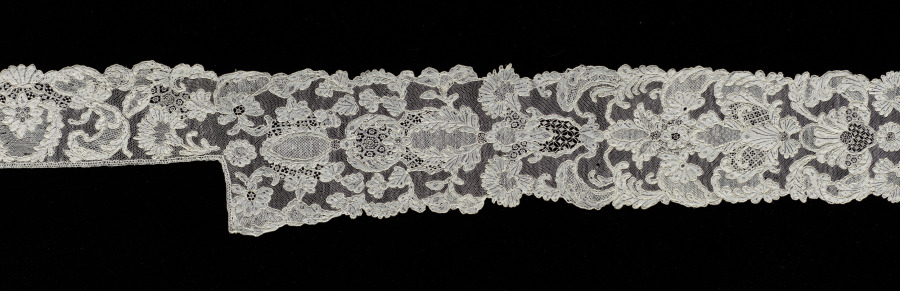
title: Lace Lappets and Edging for Cap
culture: France, Alençon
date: 1700–1715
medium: Needle lace (Point d'Alençon)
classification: Lace